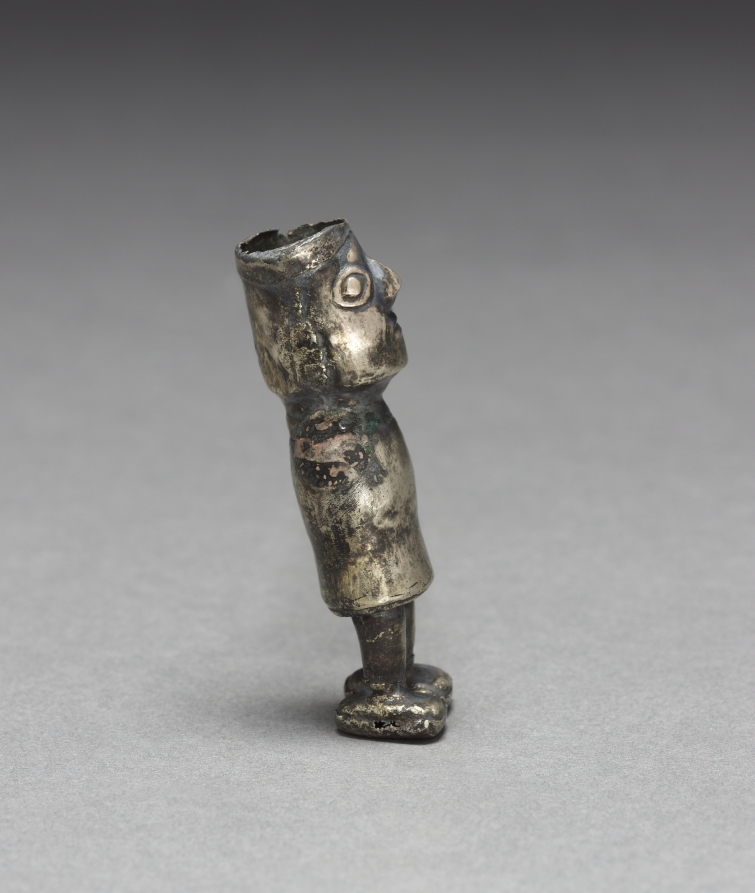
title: Figure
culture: Peru, Lambayeque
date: 1000–1532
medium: silver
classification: Metalwork